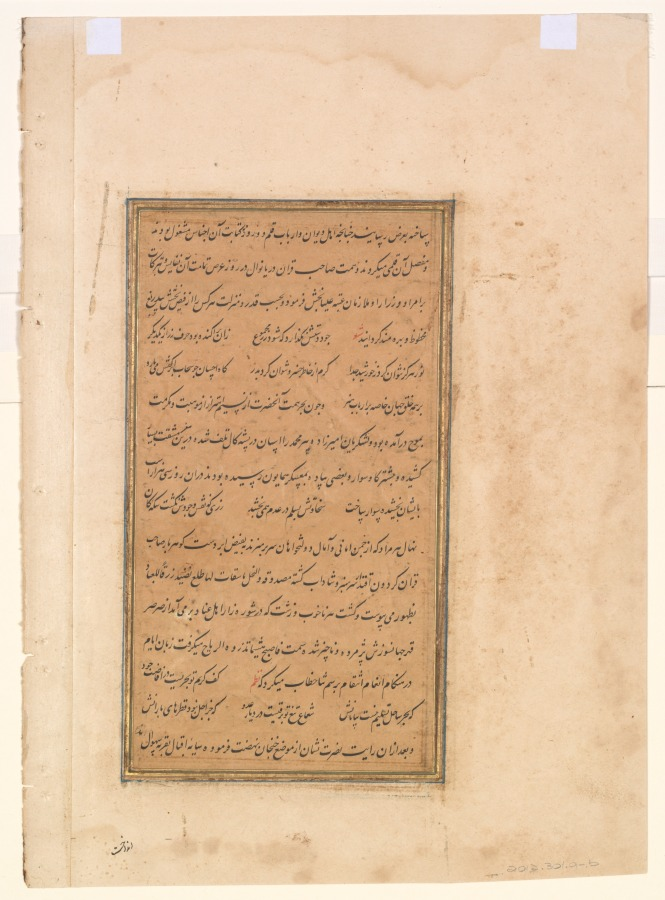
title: Timur distributes gifts from his grandson, the Prince of Multan, from a Zafar-nama (Book of Victories)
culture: Mughal India, court of Akbar (reigned 1556–1605)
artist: Shravana (Indian, active 1550s–c.1600)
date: 1598–1600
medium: Gum tempera, ink, and gold on paper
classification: Painting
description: The Turkic conqueror Timur (1336–1405) is the Mughal emperor Akbar’s most celebrated paternal ancestor. He sits on a terrace, shaded by a crimson awning. The blue carpet with gold border marking his high status is covered with a floral vine pattern that became fashionable in the 1500s. This scene takes place in a territory governed by Timur’s grandson, who sent him gifts of horses, camels, and a variety of luxury items. Timur is in the process of regifting them to members of his entourage in accordance with their merits.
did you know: Pre-modern giftwrap: Round textiles cover presentation platters.